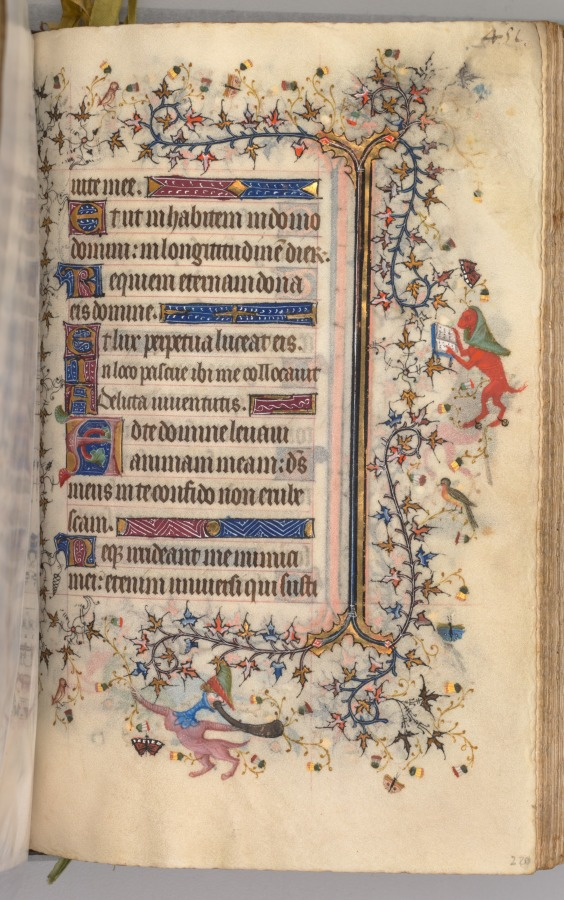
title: Hours of Charles the Noble, King of Navarre (1361-1425): fol. 220r, Text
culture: France, Paris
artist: Master of the Brussels Initials and Associates (French)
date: c. 1405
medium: ink, tempera, and gold on vellum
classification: Bound Volume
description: This precious volume was obviously highly prized by its owner, the French-born King of Navarre, who had his coat of arms painted on no less than twenty folios. Rather than directly commissioning this manuscript from a specific workshop, it seems that Charles the Noble acquired his book of hours -- perhaps ready-made for the luxury market -- while on a trip to Paris in 1404-05. A collaborative effort, six painting styles are evidenced within the pages of this codex, those of two Italians, two Frenchmen, and two Netherlanders. The painter who was responsible for the planning and decoration of the book, and who produced seventeen of the large miniatures, was a Bolognese artist known as the Master of the Brussels Initials. His principal assistant, responsible for most of the borders, was a Florentine who signed his name "Zecho" da Firenze on folio 208 verso.